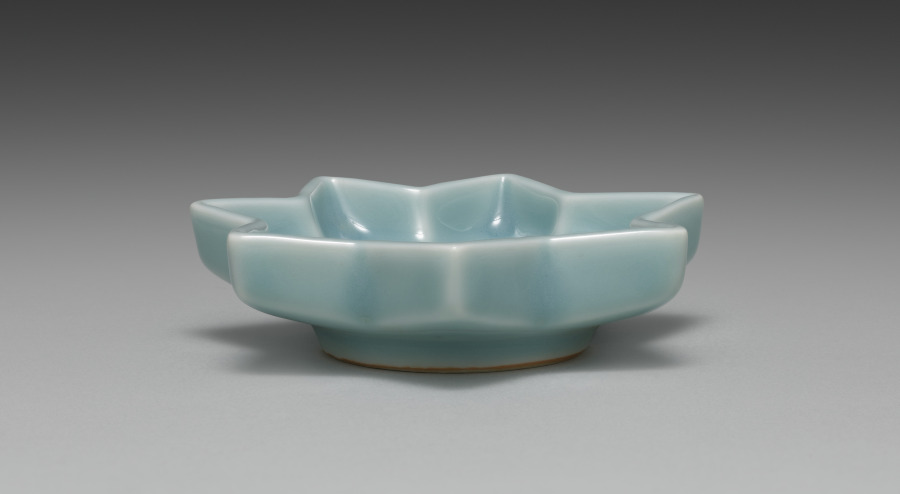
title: Saucer from Maple Leaf-Shaped Saucers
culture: Japan, Meiji period (1868–1912)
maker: Seifū Yohei III (Japanese, 1851–1914)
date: 1893–1914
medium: One of five dishes from a set of ten; porcelain with blue glaze and molded design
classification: Ceramic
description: These maple leaf–shaped saucers, like Yohei III's five shell saucers CMA 2022.188, have a long, horizontal box with a separate compartment for each piece. Now a set of five, these dishes were originally a set of ten, stored in two boxes of five each. From their housings, which accommodate differing numbers of objects, one can hypothesize that while some items created by the Seifu studio were intended to be acquired in larger sets, and thus were perhaps made to order, others, like these, may have been items to be purchased of the shelf in set quantities that allowed clients flexibility in scale. The box for these five saucers describes them as “heavenly blue[–glazed] porcelain” (tenseiji). The veins of the leaves are slightly raised in the clay so that the glaze pools around them and they stand out as white where the glaze thins. There are longer lines at the points of the leaves and shorter ones following the wall of each indentation so that the design has both a horizontal and a subtle vertical dimension.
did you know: These saucers shaped like maple leaves show Seifū Yohei III’s “heavenly blue glaze.”